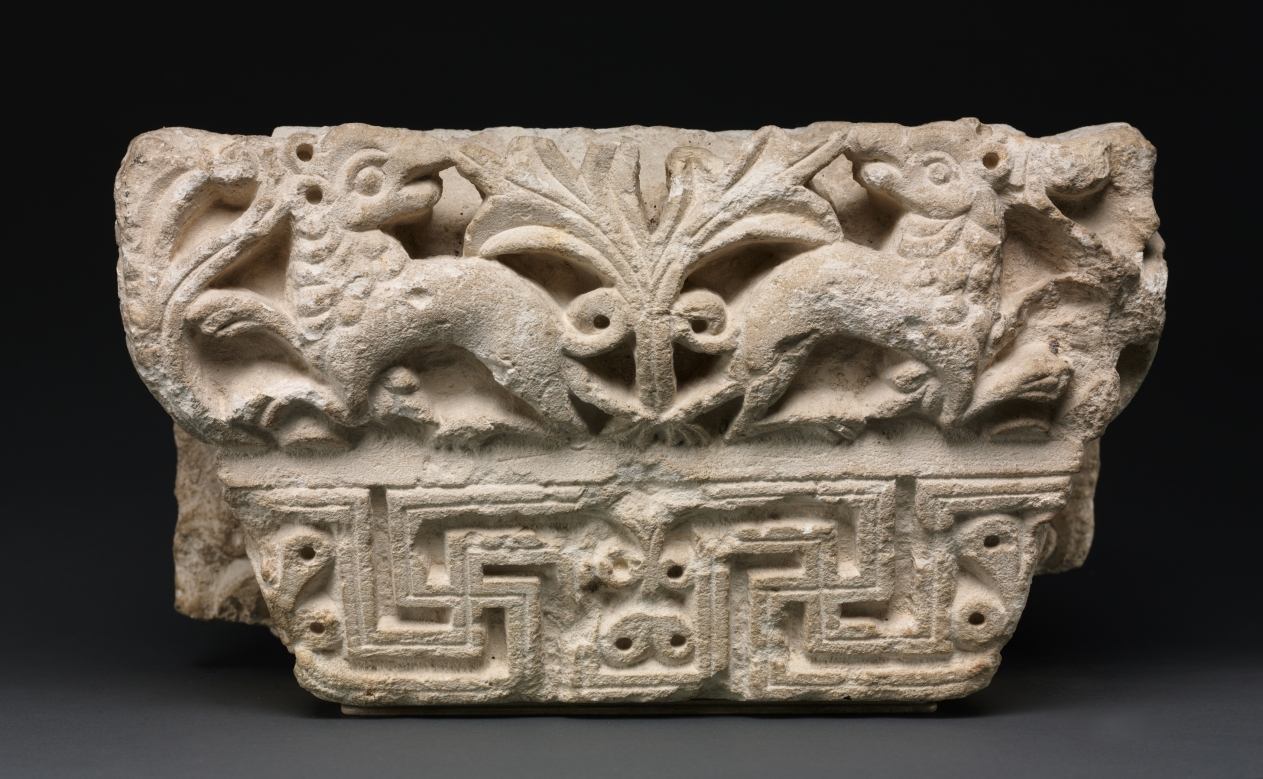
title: Engaged Capital with Animals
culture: Egypt, Coptic period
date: 400s - 500s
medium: limestone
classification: Sculpture